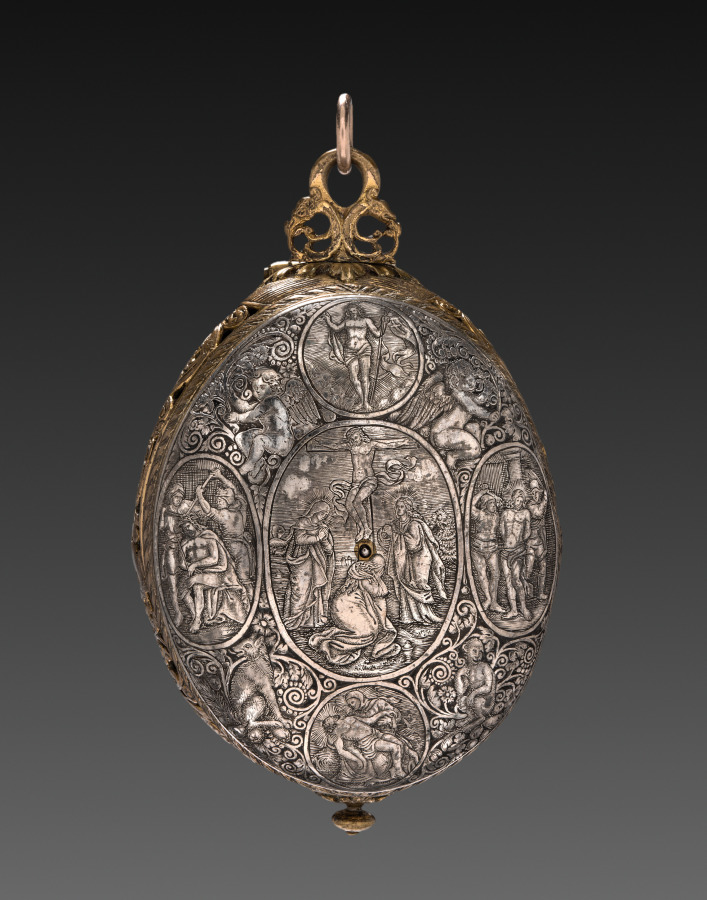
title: Engraved Egg Watch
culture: France, 16th century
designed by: Denis Martinot (French)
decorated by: attributed to Theodor de Bry (Flemish, 1528–1598)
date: 1590–1600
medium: silver, steel, and rock crystal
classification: Jewelry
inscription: inscribed: D. Martinot, Paris.